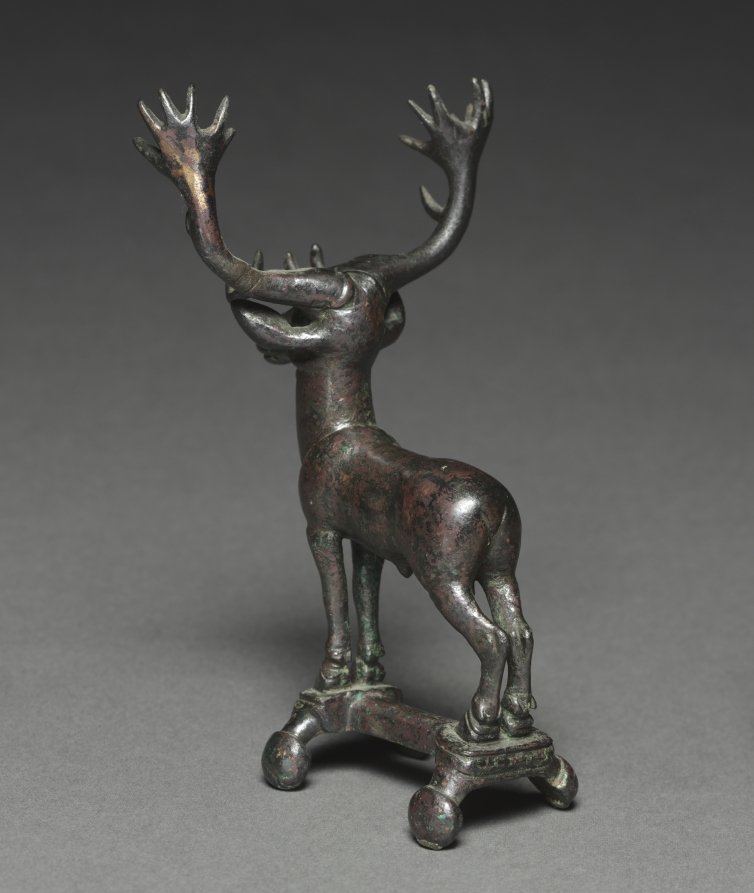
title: Stag Poletop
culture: Eastern Anatolia, Hittite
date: 1400–1200 BCE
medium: bronze, solid cast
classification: Sculpture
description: The stag was sacred to the Hittite god of the countryside.